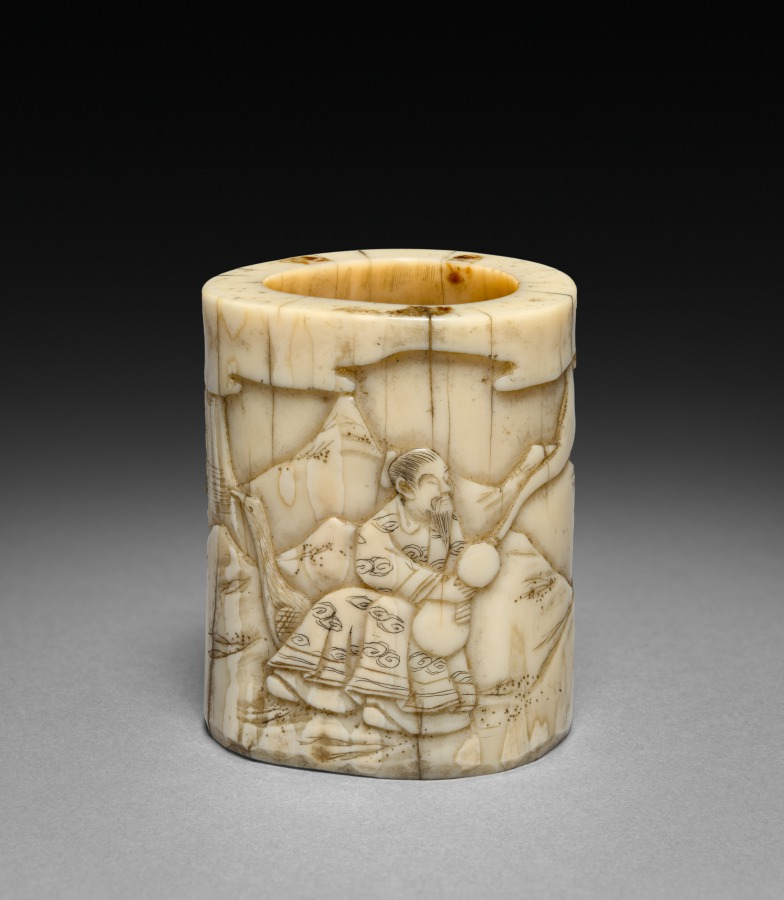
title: Carved Tusk with Chinese Immortal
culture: Japan, Meiji period (1868–1912)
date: c. 1868–1912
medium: Carved ivory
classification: Ivory